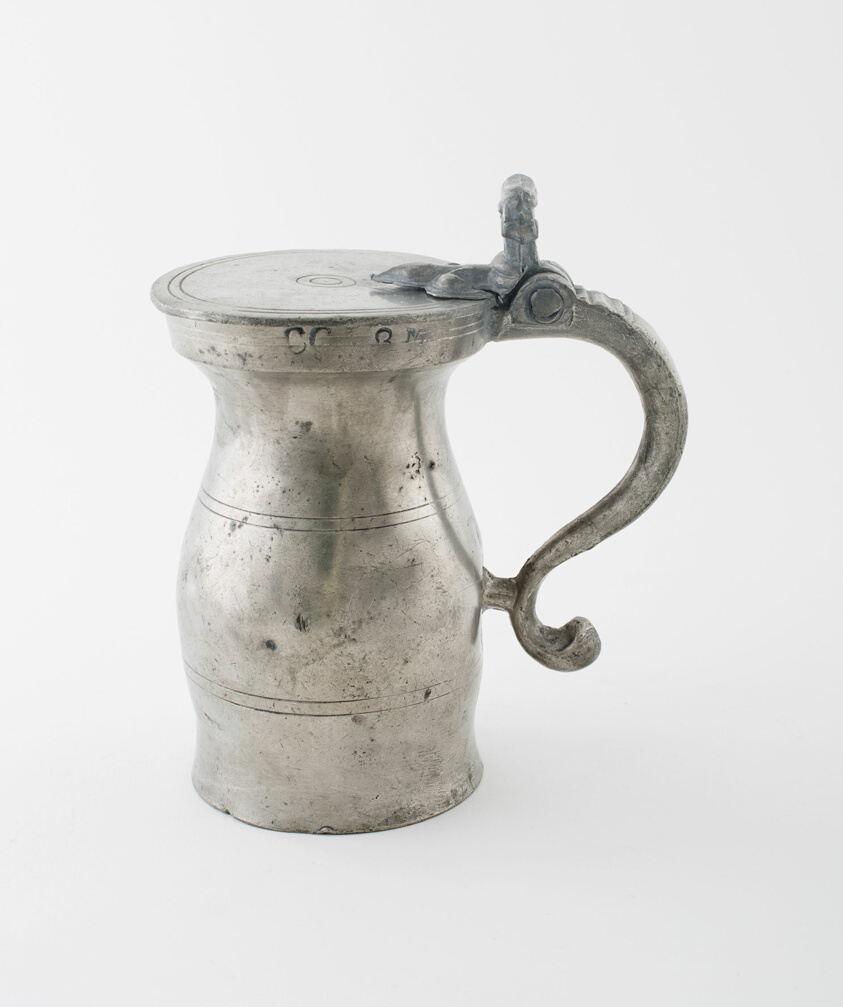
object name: Metalwork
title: Pint Wine Measure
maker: England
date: c. 1780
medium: Pewter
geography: England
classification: pewter; metalwork; european decorative arts